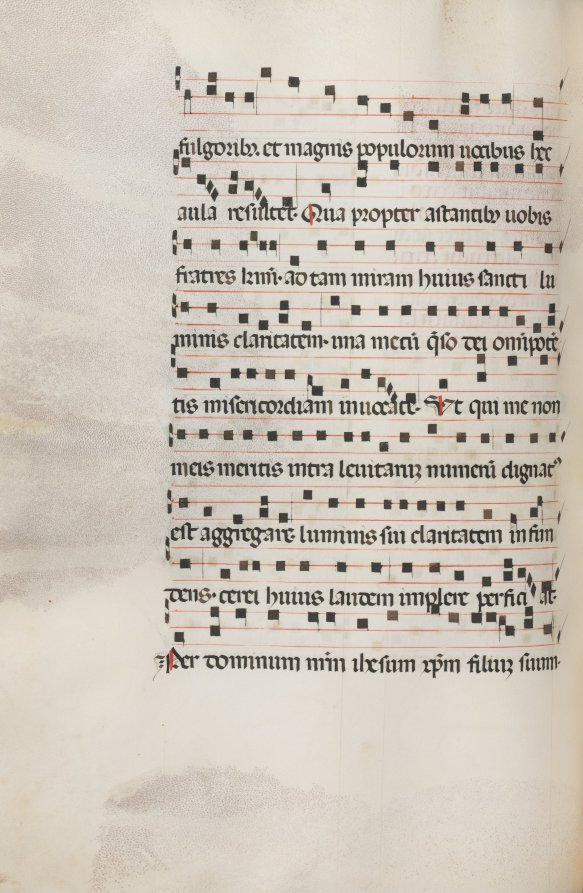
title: Missale: Fol. 153v: Music for "Exultet"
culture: Italy, Perugia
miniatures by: Bartolommeo Caporali (Italian, c. 1420–1503)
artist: assisted by Giapeco Caporali (Italian, d. 1478)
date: 1469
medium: ink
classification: Bound Volume